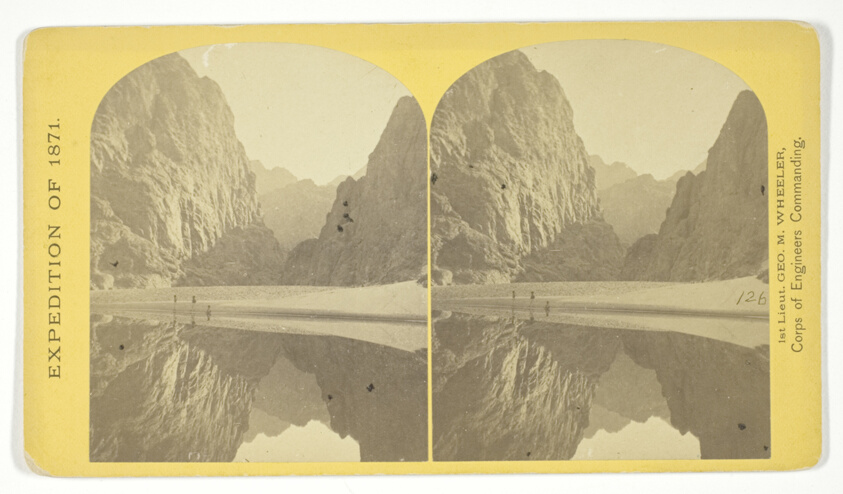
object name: Photograph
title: View down Black Cañon, from Mirror Bar. The walls repeated by reflection, No. 3 from the series "Geographical Explorations and Surveys West of the 100th Meridian"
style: 19th century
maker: Timothy O'Sullivan (American, born Ireland, 1840–1882); commissioned by George Wheeler for the War Department, Corps of Engineers, U.S. Army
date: 1871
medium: Albumen print, stereo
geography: United States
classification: stereograph (albumen); photography; photograph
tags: Collected by Hugh Edwards, Geographical Explorations and Surveys